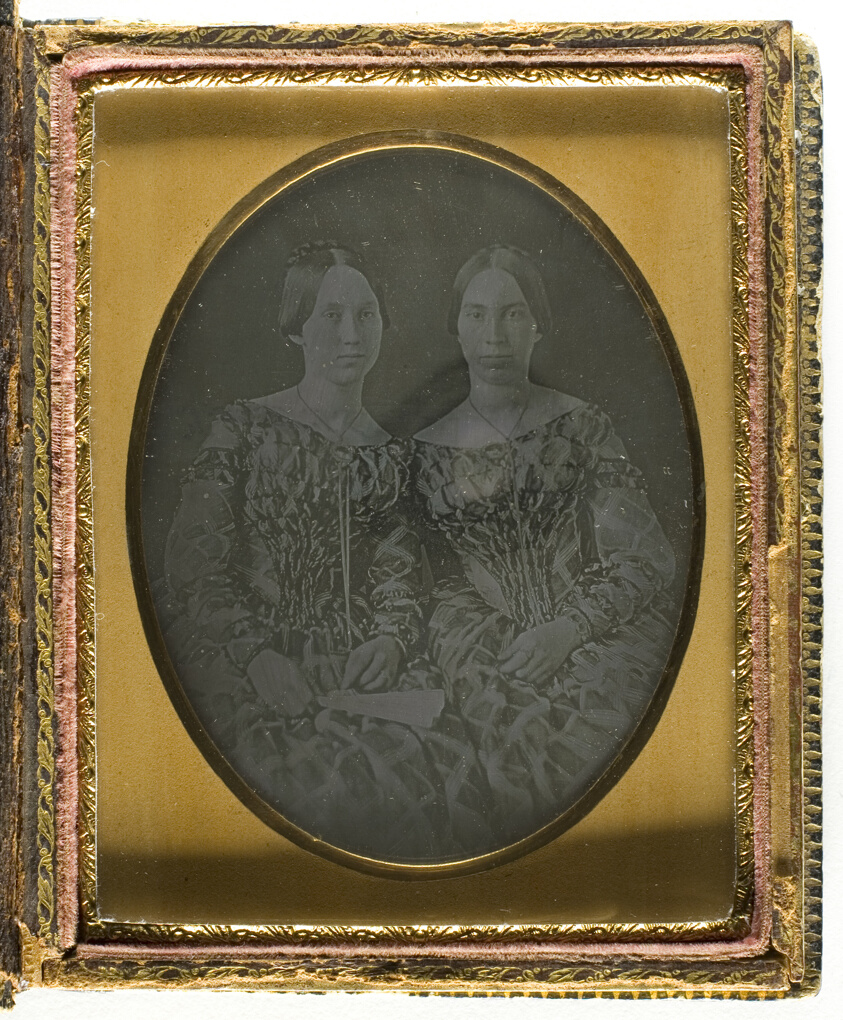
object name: Photograph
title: Untitled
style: 19th century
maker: Artist unknown; 19th century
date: c. 1839/60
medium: Daguerreotype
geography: Unknown Place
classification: daguerreotype; photographic process; photography; photograph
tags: Collected by Hugh Edwards